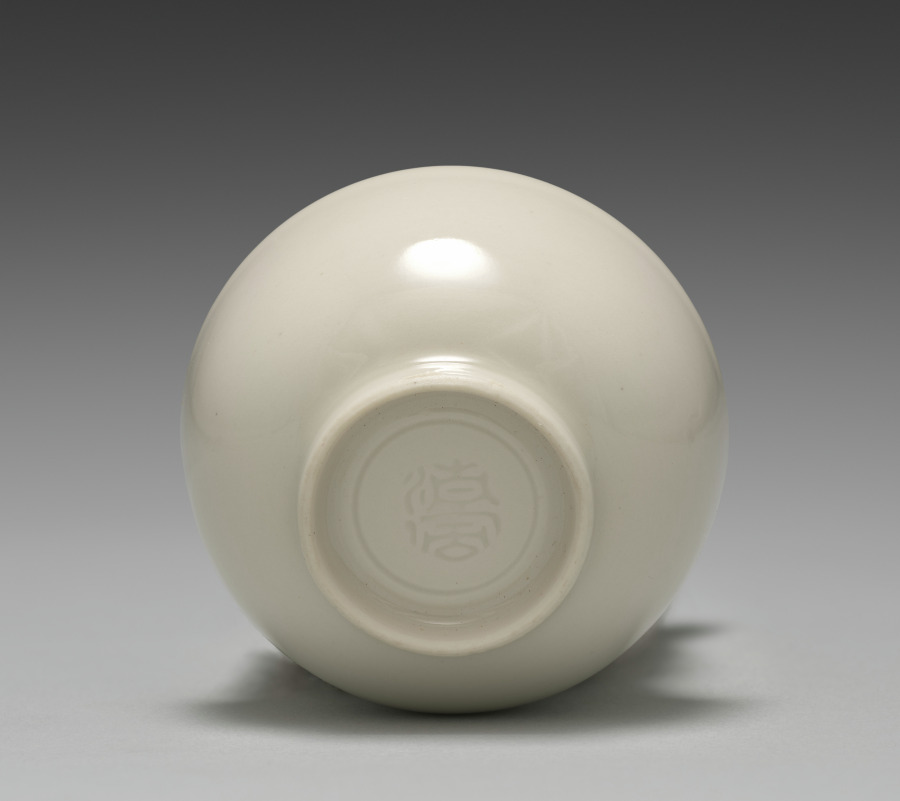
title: Sake Cup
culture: Japan, Meiji period (1868–1912)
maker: Seifū Yohei III (Japanese, 1851–1914)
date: c. 1893–1914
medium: porcelain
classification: Ceramic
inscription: 清風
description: Seifū Yohei III was the first ceramist to be designated an Imperial Household Artist, a position that came with an annuity. He was tasked with producing items need by the imperial household to decorate the Meiji Palace and to present to state guests as gifts.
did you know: There are subtle bamboo leaflike shapes on the interior of the sake cup.